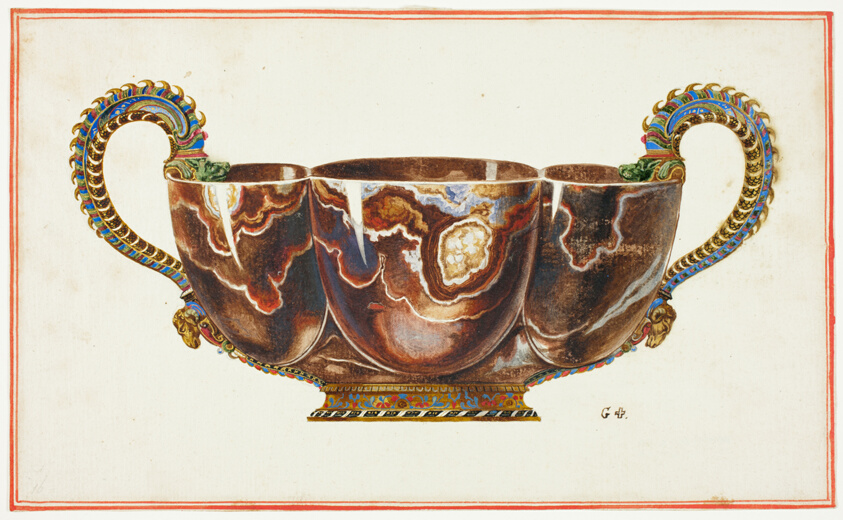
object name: Drawing and Watercolor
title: Basin with Enamelled Handles, Decorated with Dragon and Ram Heads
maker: Giuseppe Grisoni (Italian, born Flanders, 1699-1769)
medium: Gouache, heightened with gold paint, over black chalk, on ivory laid paper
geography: Flanders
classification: gouache; watercolor; drawings (visual works); prints and drawing